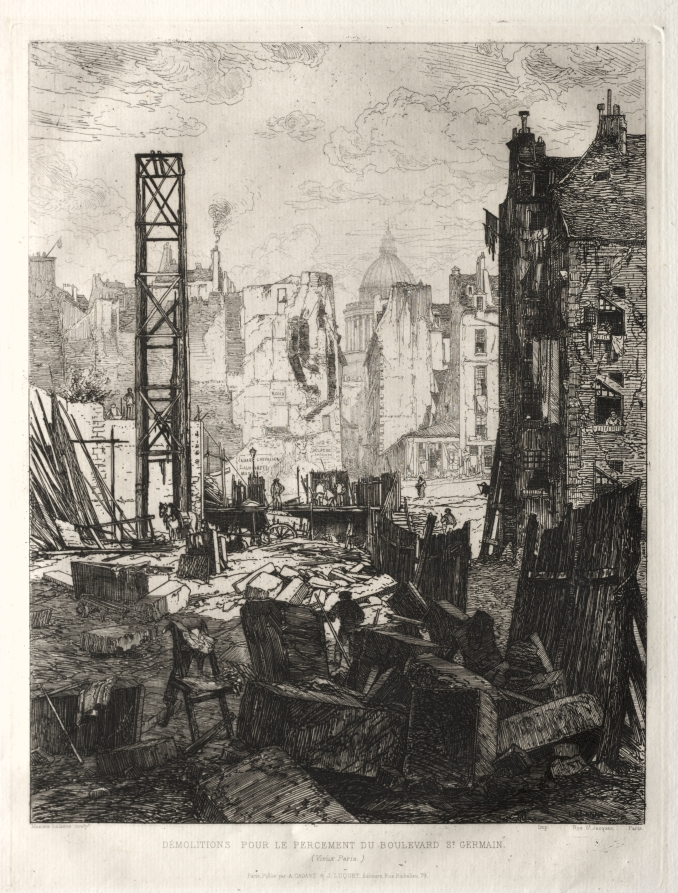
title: Demolitions pour la Perement du Boulevard St. Germain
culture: France, 19th century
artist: Maxime Lalanne (French, 1827–1886)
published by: CADART & LUQUET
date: 1874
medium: etching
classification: Print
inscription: inscribed in plate: Lalanne (l.r); printed in lower margin: Maxime Lalanne sculp. (l.l.); Imp. Rue St. Jacques Paris (l.r); DEMOLITIONS POUR LE PERCEMENT DU BOULEVARD St. GERMAIN./ (Vieux Paris)/ Paris, Punlié par A. CADART & J. LUQUET, Éditeors, Rue Richelieu, 79 (l.c)